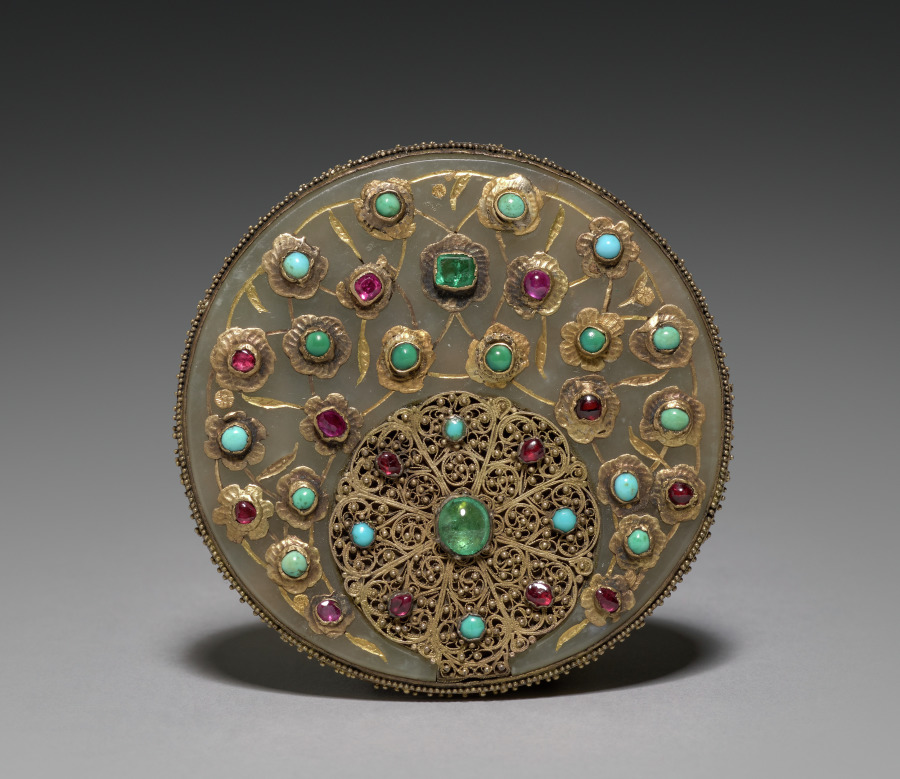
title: Box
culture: Germany ?, late 18th century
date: late 1700s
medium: enamel on copper with gilt metal mounts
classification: Miscellaneous